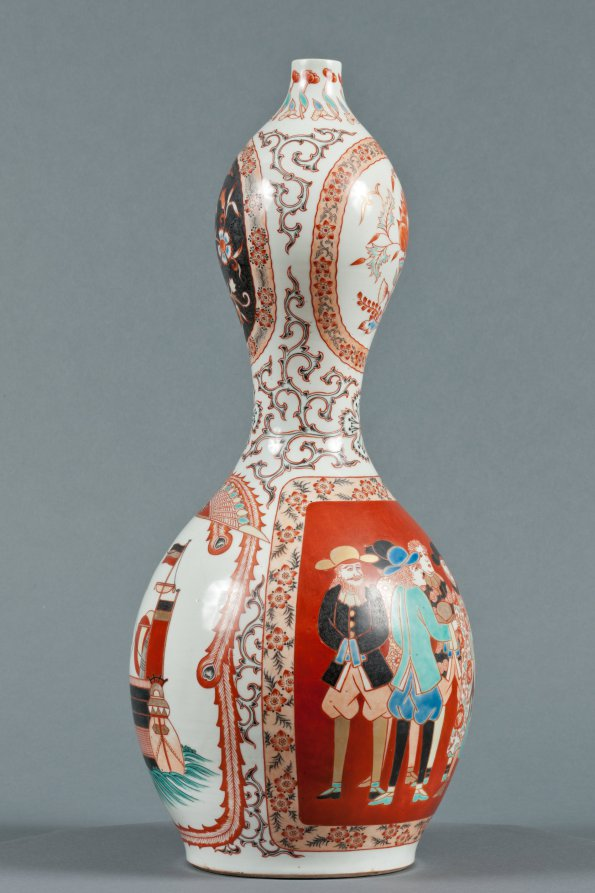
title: Bottle with Western Ships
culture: Japan, Edo period (1615–1868)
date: c. 1800–1868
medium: Porcelain with decoration in colored enamels and underglaze blue, overglaze enamels, and gold (Hizen ware, Arita type)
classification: Ceramic